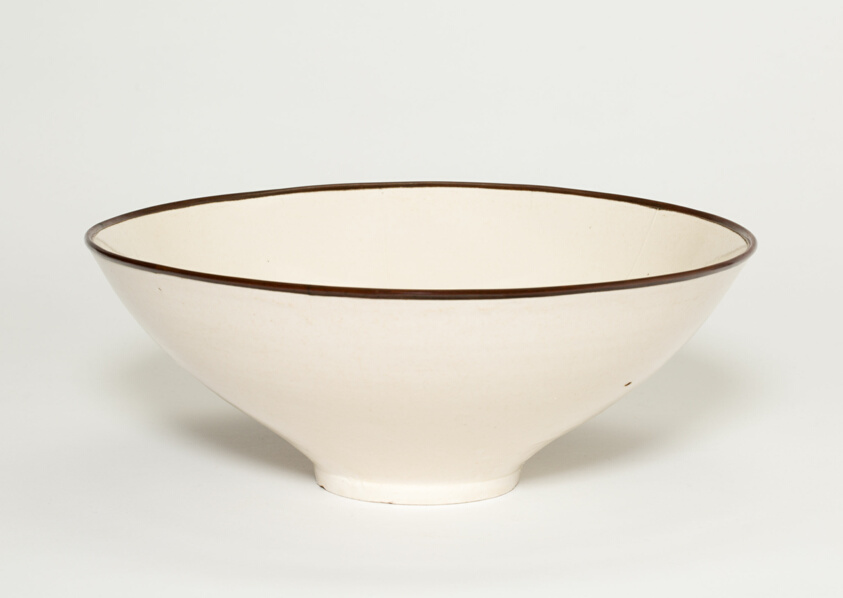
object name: Vessel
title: Bowl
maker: China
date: Northern Song dynasty (960-1127)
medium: Ding ware; stoneware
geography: China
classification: ceramics; asian art